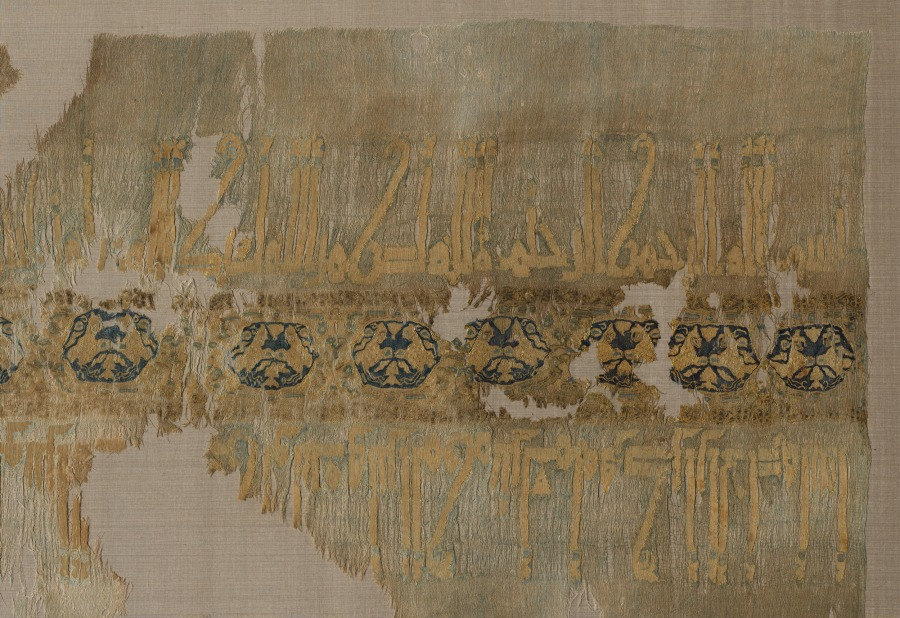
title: Turban end with tiraz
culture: Egypt, Tinnis, Fatimid period, datable to 983-90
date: 983–990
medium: plain weave with inwoven tapestry weave: linen and silk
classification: Textile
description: This finely woven linen cloth, dyed a cherished pistachio color, was cut from a longer fabric worn folded and wrapped as a turban with the silk tapestry-woven decoration shown off in the front. It contains two opposing rows of nearly identical Arabic text separated by a row of medallions displaying a pair of birds. The historical text begins by praising Allah, asking that he assist the Caliph al-‘Aziz and bless him and his ancestors. The inscription also specifies that the vizier Abu ibn Yusuf ordered the cloth from the private factory (tiraz) in Tinnis. This luxurious cloth could have been a gift from the caliph in Cairo during the Fatimid period to a courtier or visiting dignitary. It is one of the finest known examples.